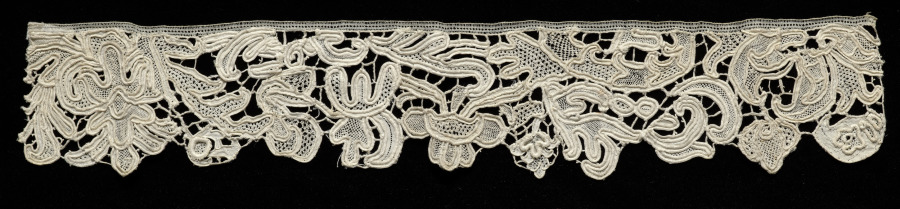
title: Lace Edging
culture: Italy or Spain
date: 1600s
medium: Needle lace (Venetian Raised Point?)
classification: Lace